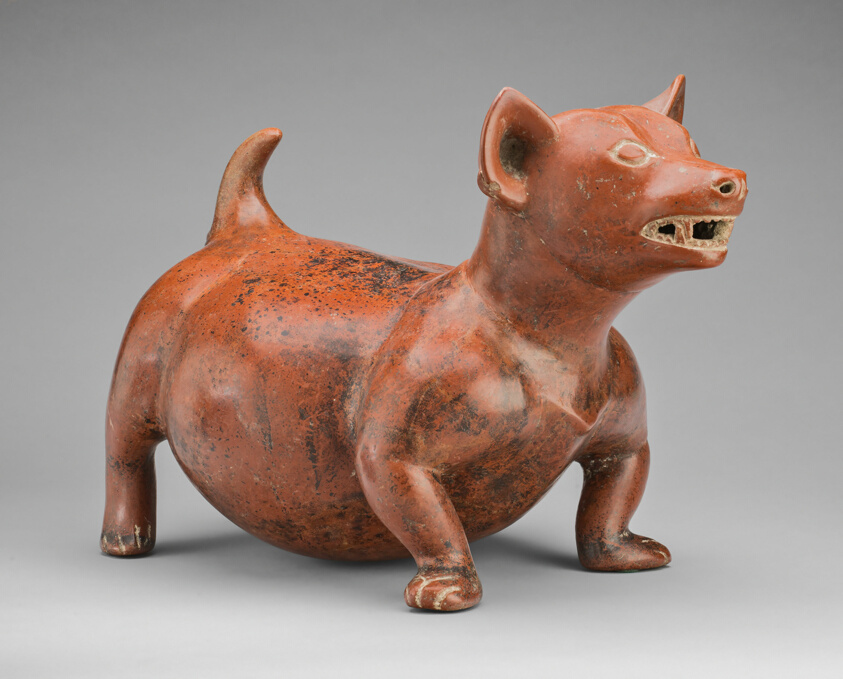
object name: Sculpture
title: Figure of a Dog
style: colima, mesoamerican, Pre-Columbian, americas, west mexico, Arts of the Americas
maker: Colima (Colima, Mexico)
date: 1–200 CE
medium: Ceramic and pigment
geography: Colima state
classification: earthenware; art of the americas; ceramics; sculpture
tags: feast, animals, death, underworld, dog